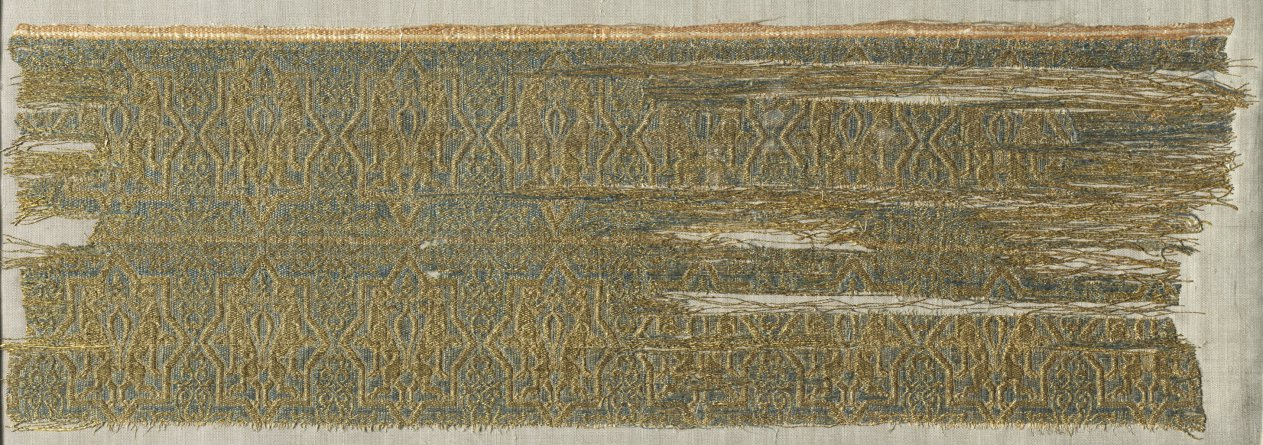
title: Taqueté fragment with star and cross pattern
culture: Spain, probably Almeria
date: 1200s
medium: taqueté: silk and gold thread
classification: Textile